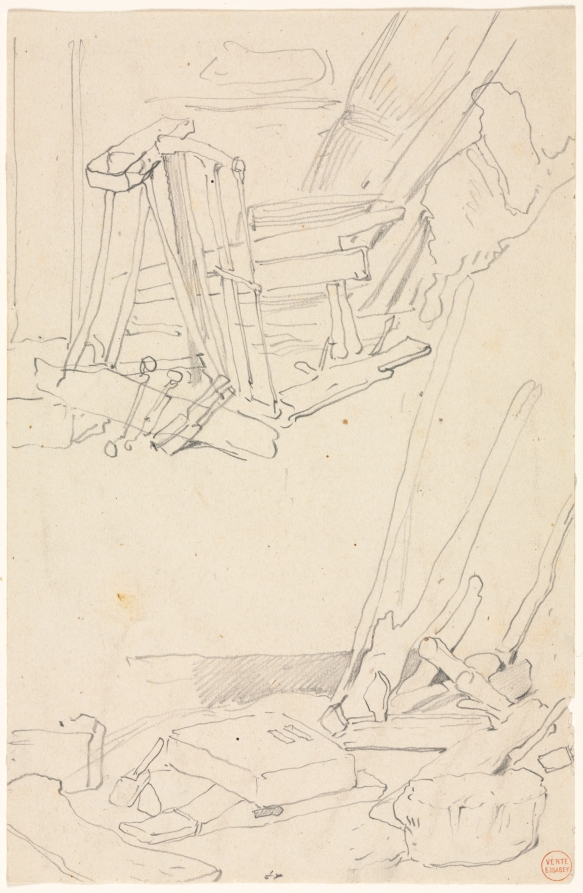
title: Studies of Wood and Farm Implements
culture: France, 19th century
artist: Eugène Isabey (French, 1803–1886)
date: c. 1824–86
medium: graphite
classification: Drawing